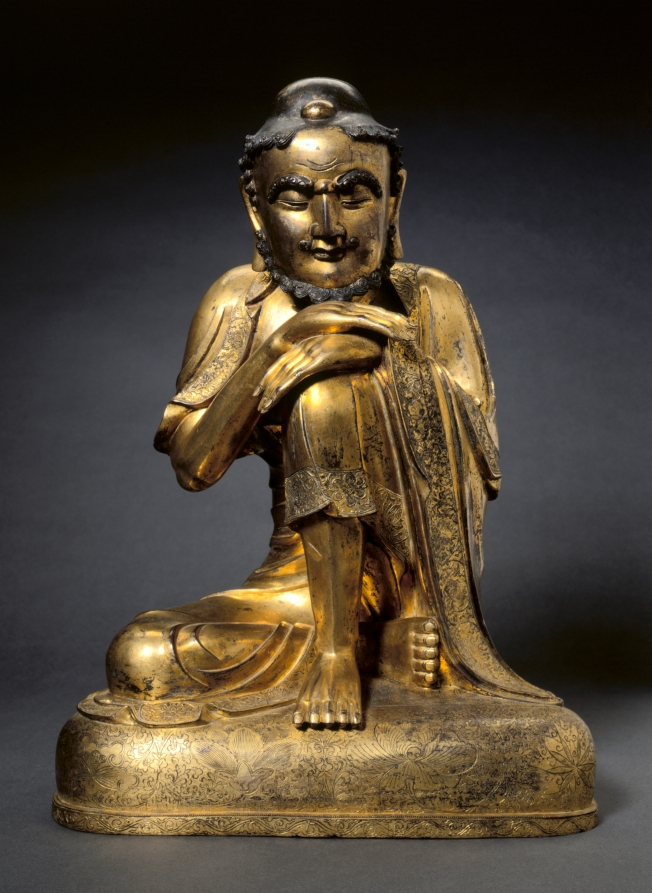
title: Shakyamuni as an Ascetic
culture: China, Yuan dynasty (1271–1368)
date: early 1300s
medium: gilt bronze with polychromy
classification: Sculpture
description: This statue is of monumental scale and exceptionally fine workmanship. A work of this size and quality was likely to have been made in the official workshops under imperial auspices. The image of the ascetic Shakyamuni (the historical Buddha) is both powerful and immediate. Shakyamuni is portrayed in a state of contemplative meditation with closed eyes and an inward smile. He leans forward, head and hands resting on an upraised knee. The representation speaks eloquently of his withdrawal from the world to attain self-realization. It recalls another famous iconic image in the Cleveland collection depicting Shakyamuni descending from the mountains after enlightenment, CMA 1970.2.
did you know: Although the historical Buddha is here portrayed during a time of spiritual discipline and abstention from earthly pleasures, his robe has a sumptuous, elaborately decorated border.